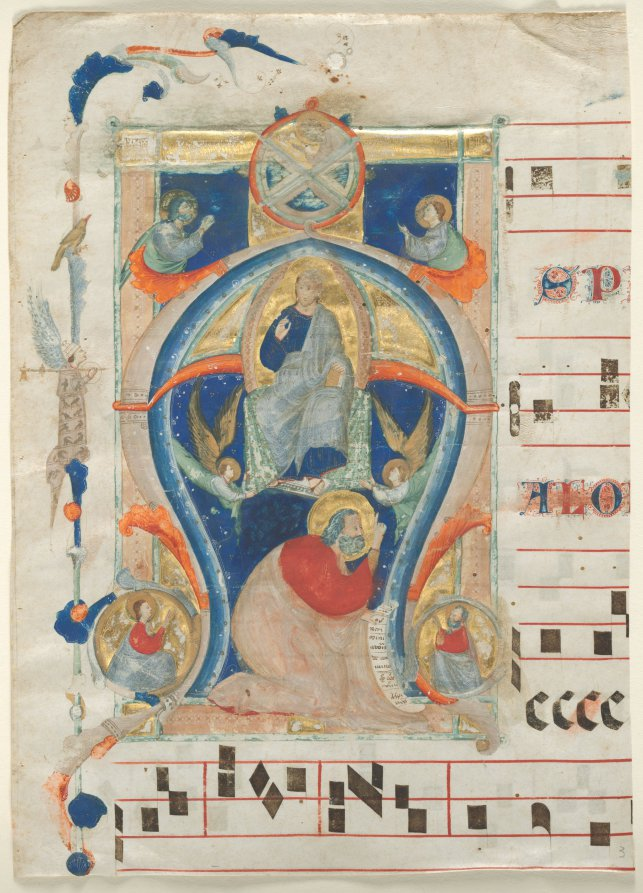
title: Fragment of an Antiphonary with Historiated Initial (A): Christ in Majesty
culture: Italy, Rimini, 14th century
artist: Neri da Rimini (Italian)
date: 1308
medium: ink, tempera, and gold on parchment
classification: Manuscript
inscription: Signed and dated: "1308"